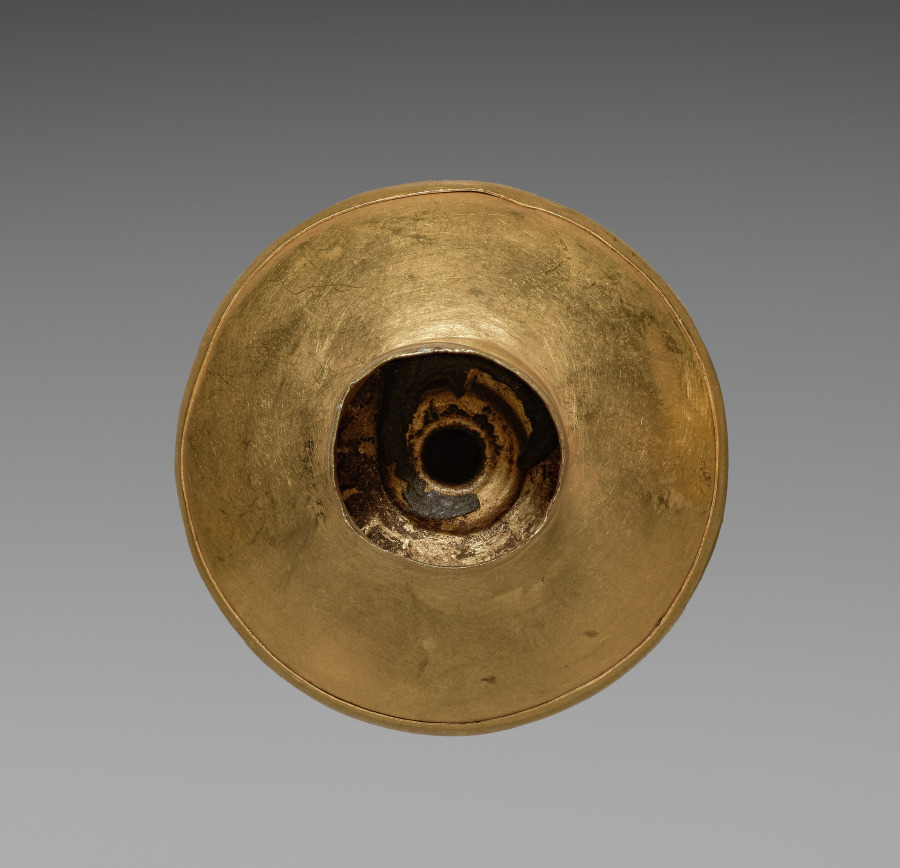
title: Ear Spool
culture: Panama, Conte style, 5th - 10th century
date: c. 400–900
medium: hammered gold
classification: Metalwork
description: Harvard archaeologists excavated this and seven other ornaments from several burials at Sitio Conte, a cemetery famous for its lavish graves of powerful chieftains. The young man buried in Grave 26 was such a chief. His status was stunningly memorialized by 21 human companions and 475 objects, many of them personal ornaments made of gold, including a large chest plaque and a rod-shaped ear ornament.